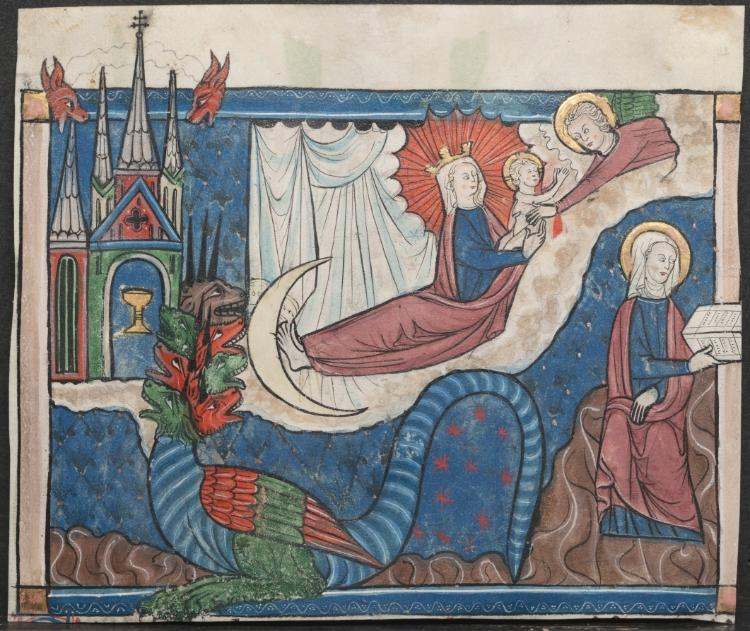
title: Miniature from a Manuscript of the Apocalypse: The Woman Clothed with the Sun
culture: France, Lorraine, 13th century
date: c. 1295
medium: ink, tempera, and gold on vellum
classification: Manuscript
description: The visionary text of St. John the Evangelist's Apocalypse, the final book of the New Testament, inspired these images of salvation, sin, and divine retribution. A large number of illustrated volumes of the Apocalypse appeared in Northern Europe, especially in England, after the year 1240--perhaps reflecting a fear of the world's end. These miniatures come from a manuscript produced in Lorraine, then artistically influenced by English models.